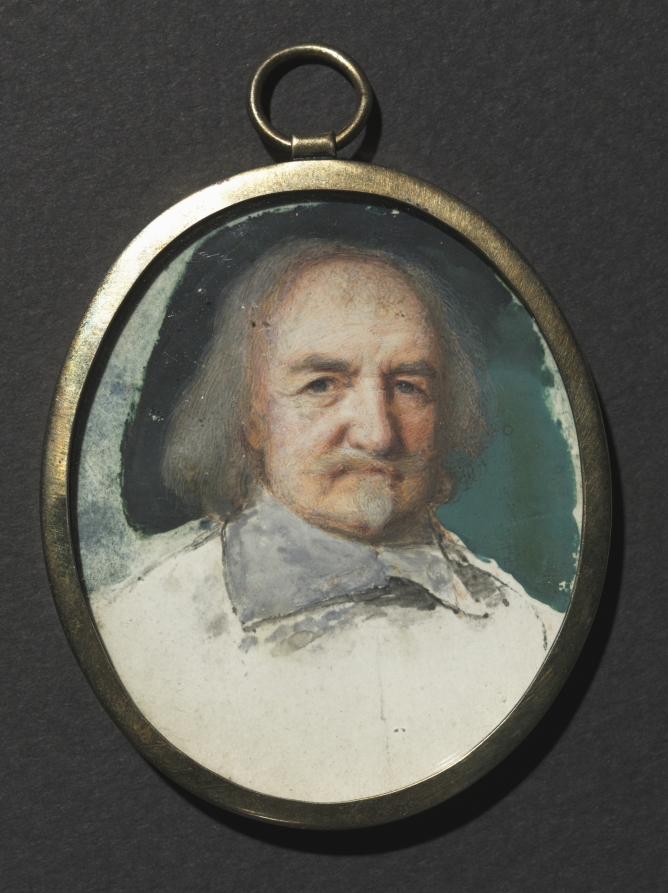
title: Portrait of Thomas Hobbes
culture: England, 17th century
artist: Samuel Cooper (British, 1608/09–1672)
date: c. 1660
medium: watercolor on vellum in a gilt metal frame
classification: Portrait Miniature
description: In his seventies when the portrait was painted, Thomas Hobbes (1588–1679) is turned slightly to his left, his eyes directed at the spectator. He has thin gray hair extending to his collar and a gray mustache and goatee. Only his head is finished; a thin gray wash loosely describes a plain, flat collar. Hobbes was born in Malmesbury, Wiltshire. In spite of humble parentage, he rose to prominence as a brilliant linguist and author of the 1651 book Leviathan, a seminal work of social contract theory that advocated for government led by a strong sovereign. As a royalist he was forced to flee England when the civil war broke out in 1642, and he resided in France until the war’s end in 1651. He was a friend of Cooper, who painted his miniature on at least two occasions.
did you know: A replica of Cleveland’s miniature was painted by Lady Margaret Bingham, Countess of Lucan.